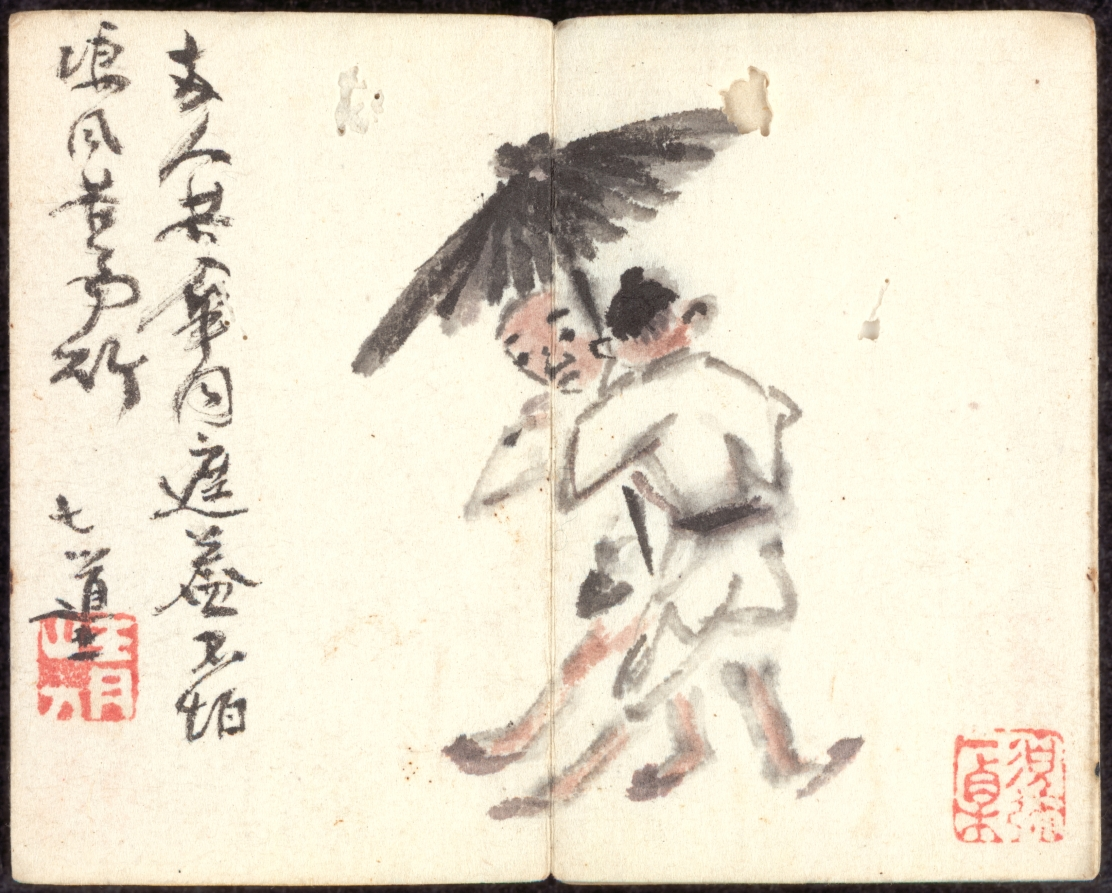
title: Miniature Album with Figures and Landscape (Two Men with Umbrella)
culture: China, Qing dynasty (1644–1911), Qianlong reign (1736–95)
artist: Zeng Yandong (Chinese, c. 1751–1827)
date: 1822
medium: album leaf, ink and color on paper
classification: Painting